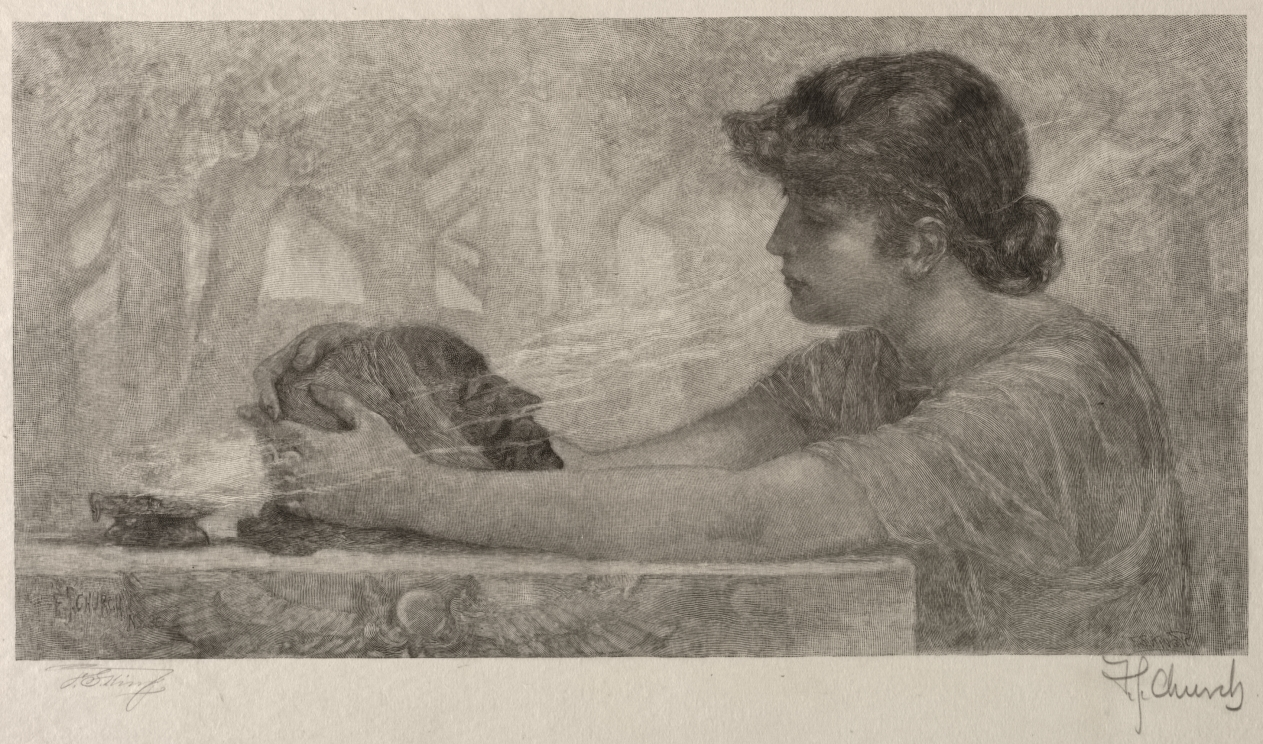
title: The Sibyl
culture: America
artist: Francis Scott King (American, 1850–1913)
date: 1887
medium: wood engraving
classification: Print